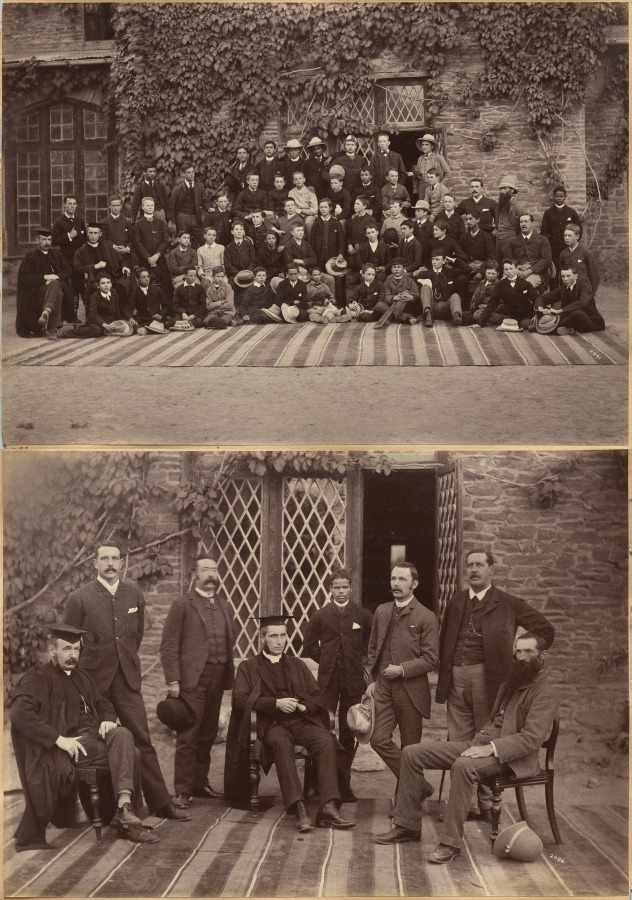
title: Principal and Teachers of Bishop Cotton School, Shimla (recto); Middle Class Students and Staff, Bishop Cotton School, Shimla (verso)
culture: India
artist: Raja Deen Dayal (Indian, 1844–1905)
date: c. 1882–87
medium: albumen print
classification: Photograph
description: These photographs are part of an album, now disassembled, of around 105 photographs taken in India between 1885 and summer 1887 that provide glimpses into the lives of the British colonial elite and royal and upper-class Indians. The museum holds another group of 37 pictures from this album (2016.266), which was probably commissioned by a British civil servant visiting or working in India around 1888 as a personal souvenir of his experiences there.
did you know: Raja Deen Dayal is regarded now, and was considered during his lifetime, to be India’s most important 19th-century photographer.